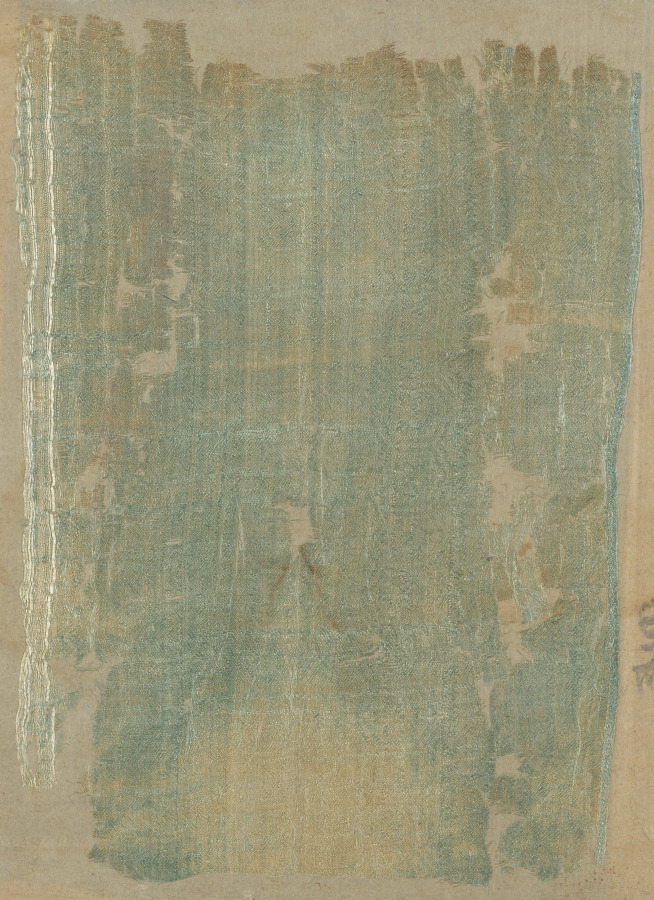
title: Fragment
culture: China, 8th century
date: 700s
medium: patterned tabby weave; silk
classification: Textile